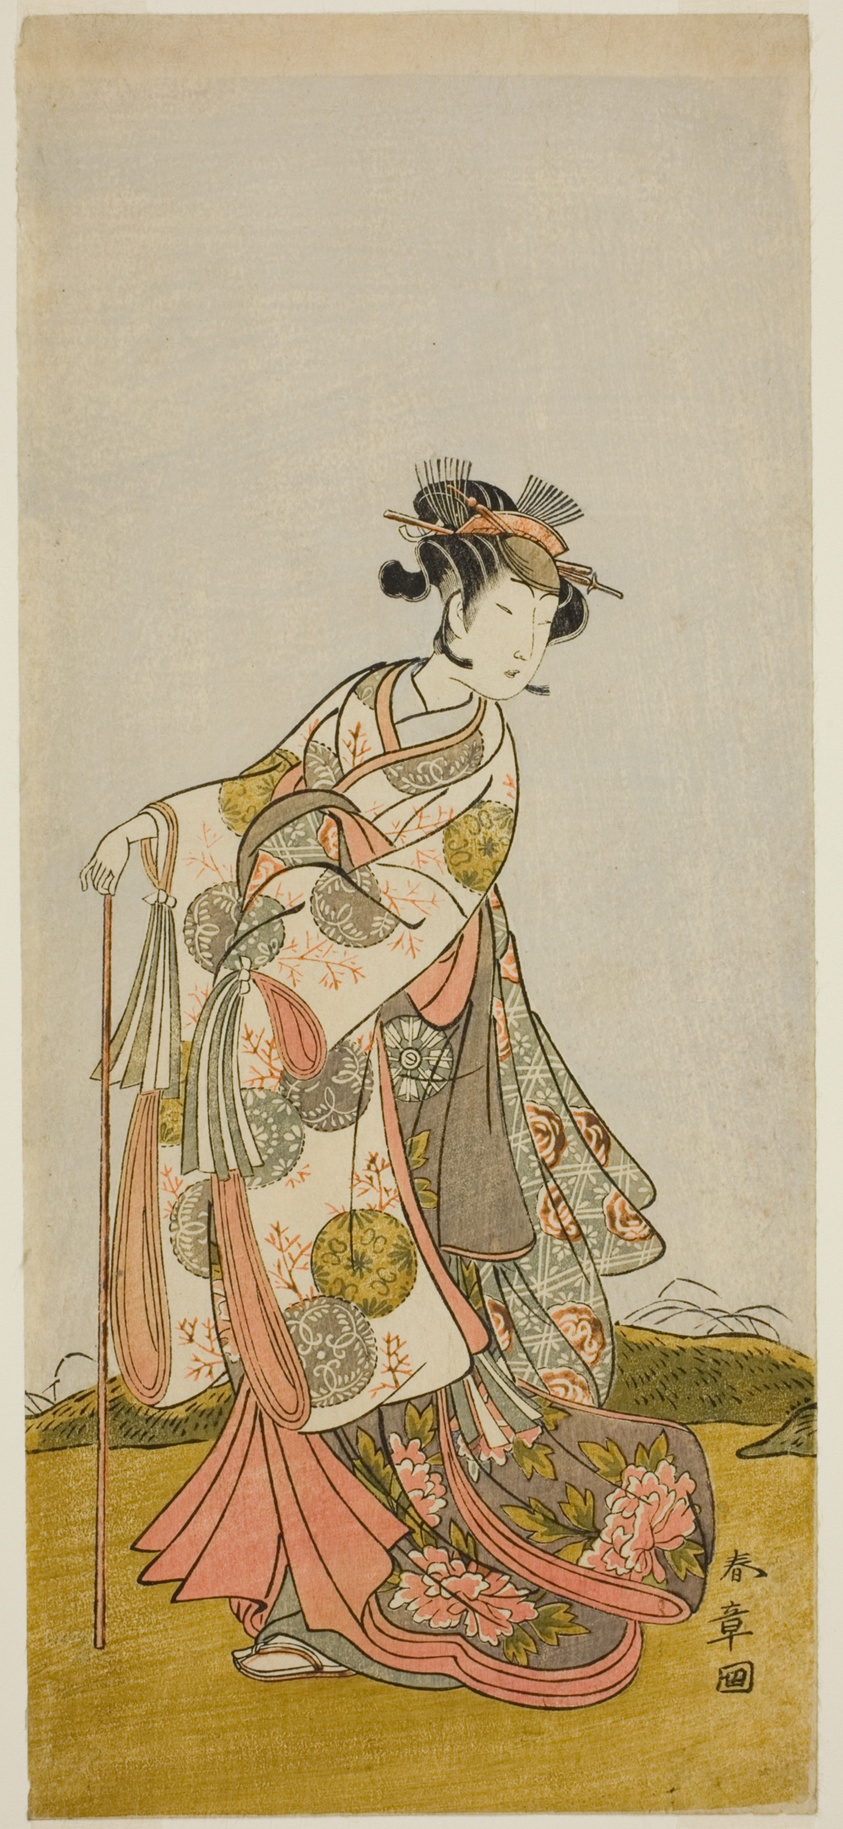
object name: Print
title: The Actor Nakamura Noshio I as Princess Usuyuki (Usuyuki Hime) in the play "Shin Usuyuki Monogatari," performed at the Morita Theater in the fifth month, 1774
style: Japanese (culture or style)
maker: Katsukawa Shunsho 勝川 春章; Japanese, 1726-1792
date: c. 1774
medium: Color woodblock print; hosoban; left sheet of diptych (?)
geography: Japan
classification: woodblock print; print; asian art